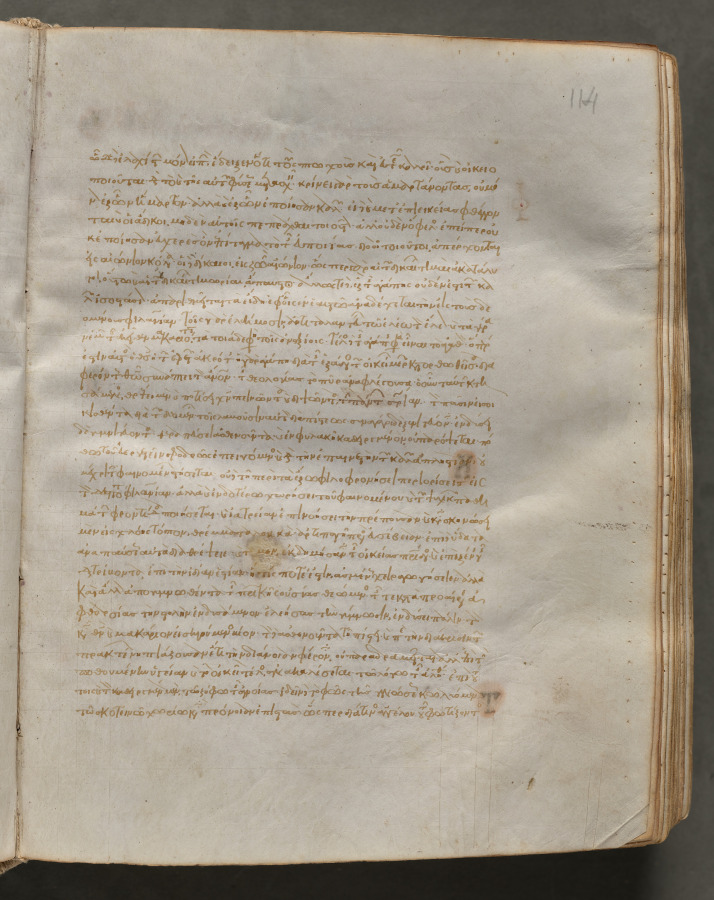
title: Text, folio 114 (recto), from a Gospel Book with Commentaries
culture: Byzantium, Constantinople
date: c. 1000–1100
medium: ink, tempera, and gold on vellum; leather binding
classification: Bound Volume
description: Each of the four gospels in this book opens on a page with brilliantly illuminated borders depicting the author of the text as well as birds-principally peacocks, symbols of the immortality of the soul-and fountains, representing the fountain of life and the salvation of the soul. This volume consists of 428 leaves with texts in Greek. Its level of sophistication suggests that it was probably written and decorated in a monastery in Constantinople.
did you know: Gospel Books were carried in procession through Byzantine churches.